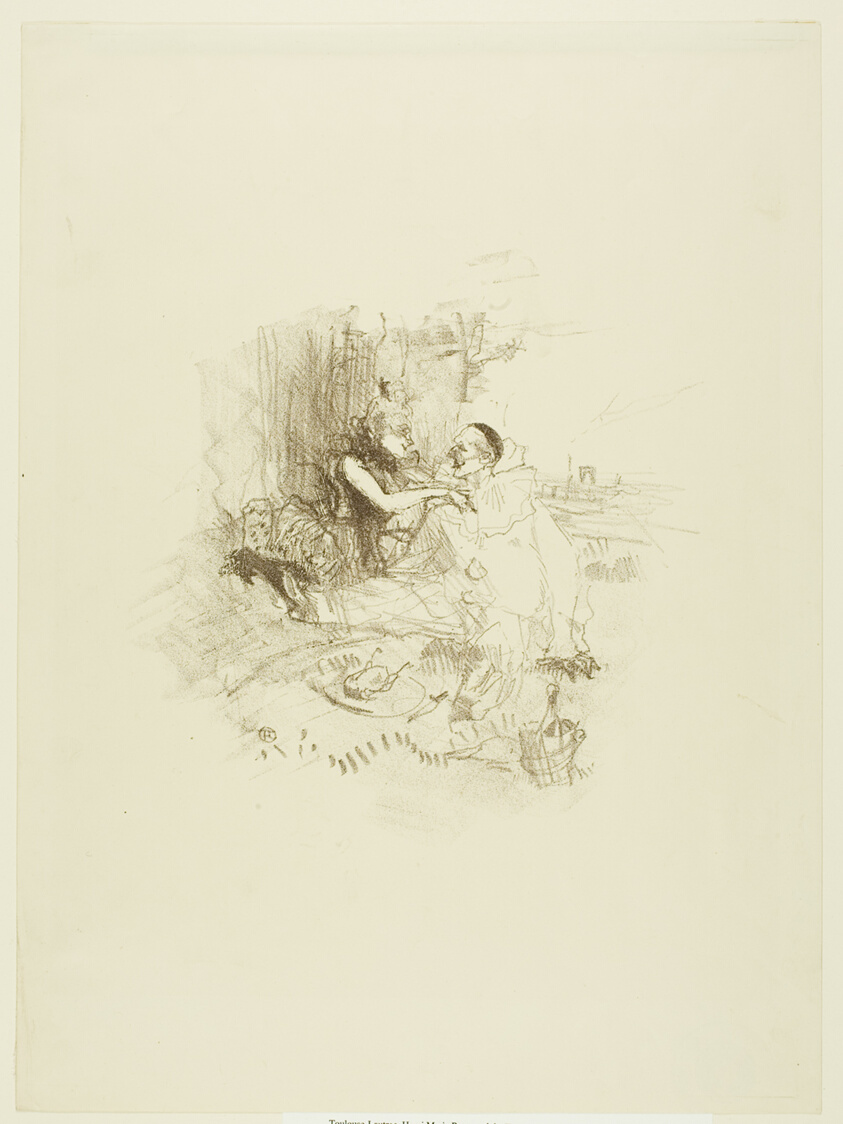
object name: Print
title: Picnic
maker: Henri de Toulouse-Lautrec (French, 1864-1901)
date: 1898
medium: Color lithograph on cream wove paper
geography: France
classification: lithograph; print; prints and drawing